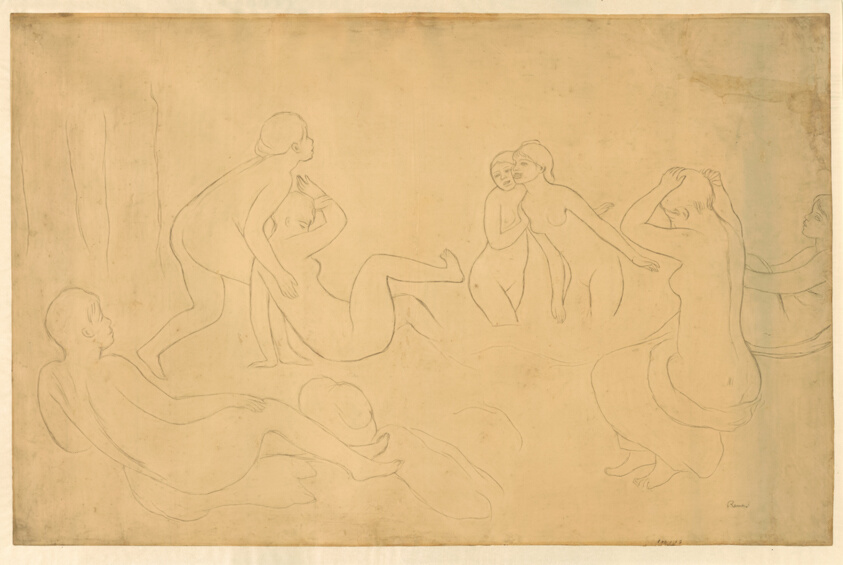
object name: Drawing and Watercolor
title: Bathers in a Forest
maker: Pierre Auguste Renoir; French, 1841–1919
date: 1895/97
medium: Graphite on tan wove paper, laid down on ivory Japanese paper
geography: France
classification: prints and drawing; graphite; drawings (visual works)